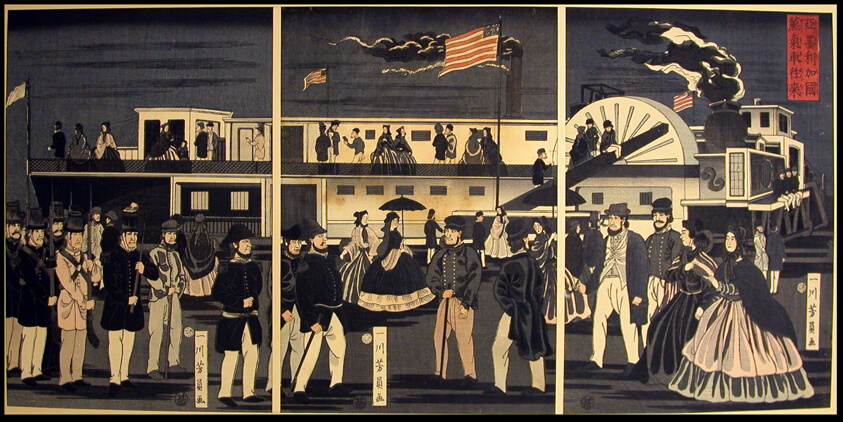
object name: Print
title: American Steam Train Travel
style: Japanese (culture or style)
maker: Utagawa Yoshikazu (Japanese, active c. 1850–70)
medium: Center sheet of triptych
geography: Japan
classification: print; asian art